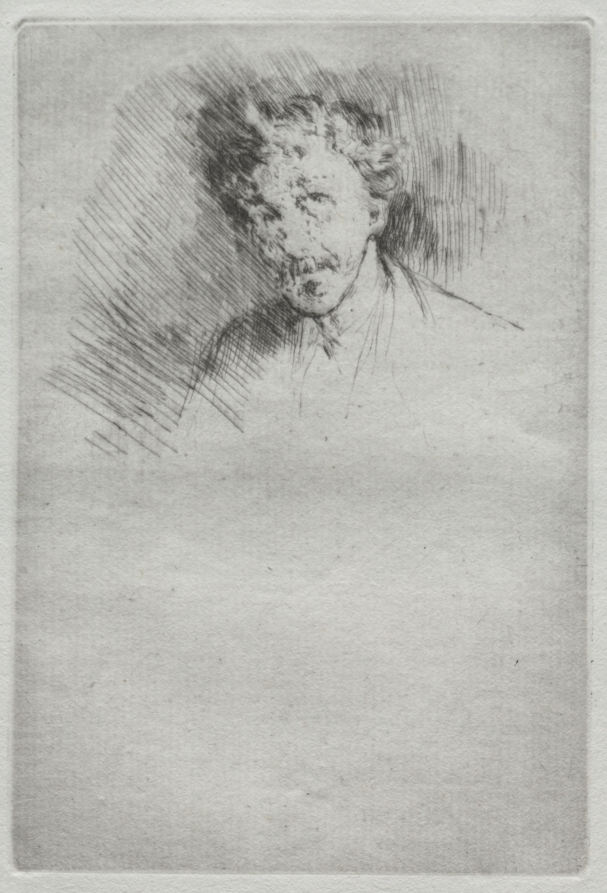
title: Whistler with the White Lock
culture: America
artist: James McNeill Whistler (American, 1834–1903)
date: 1876–79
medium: etching and drypoint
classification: Print